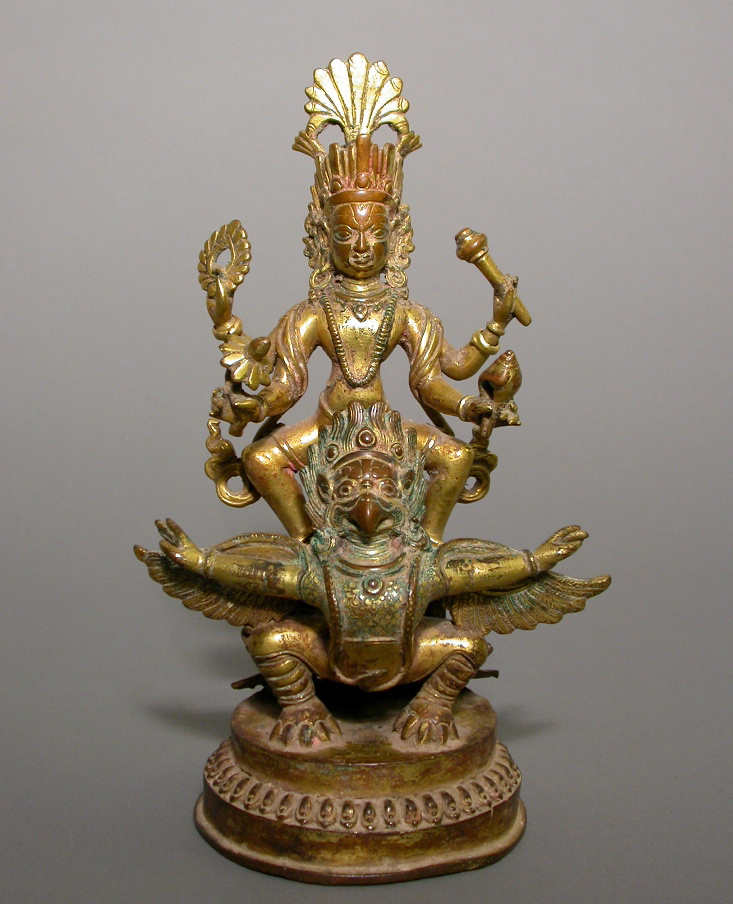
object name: Sculpture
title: God Vishnu Astride His Mount, Garuda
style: Himalayan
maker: Nepal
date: 17th/18th century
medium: Gilt bronze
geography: Nepal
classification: bronze; metal; sculpture; asian art